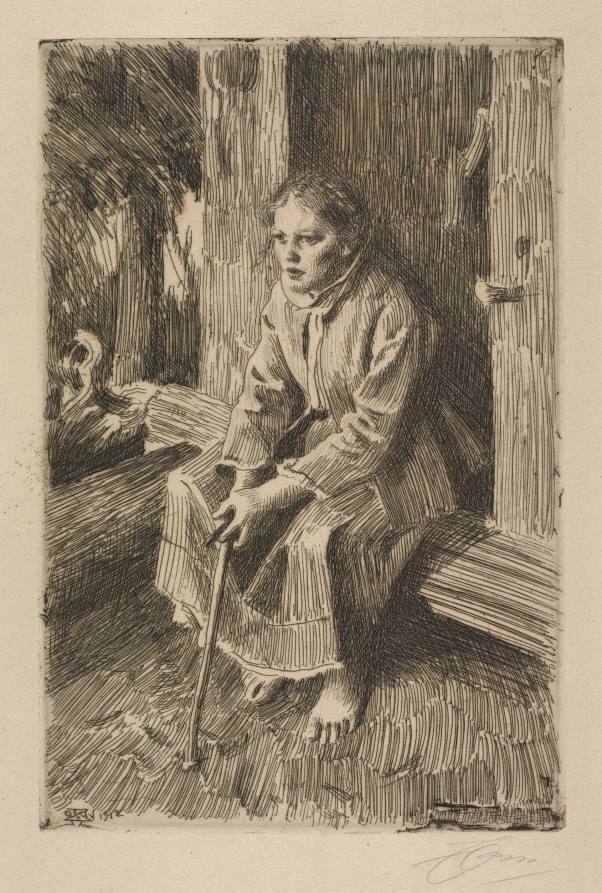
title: Vallkulla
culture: Sweden, 20th century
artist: Anders Zorn (Swedish, 1860–1920)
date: 1912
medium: etching and drypoint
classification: Print